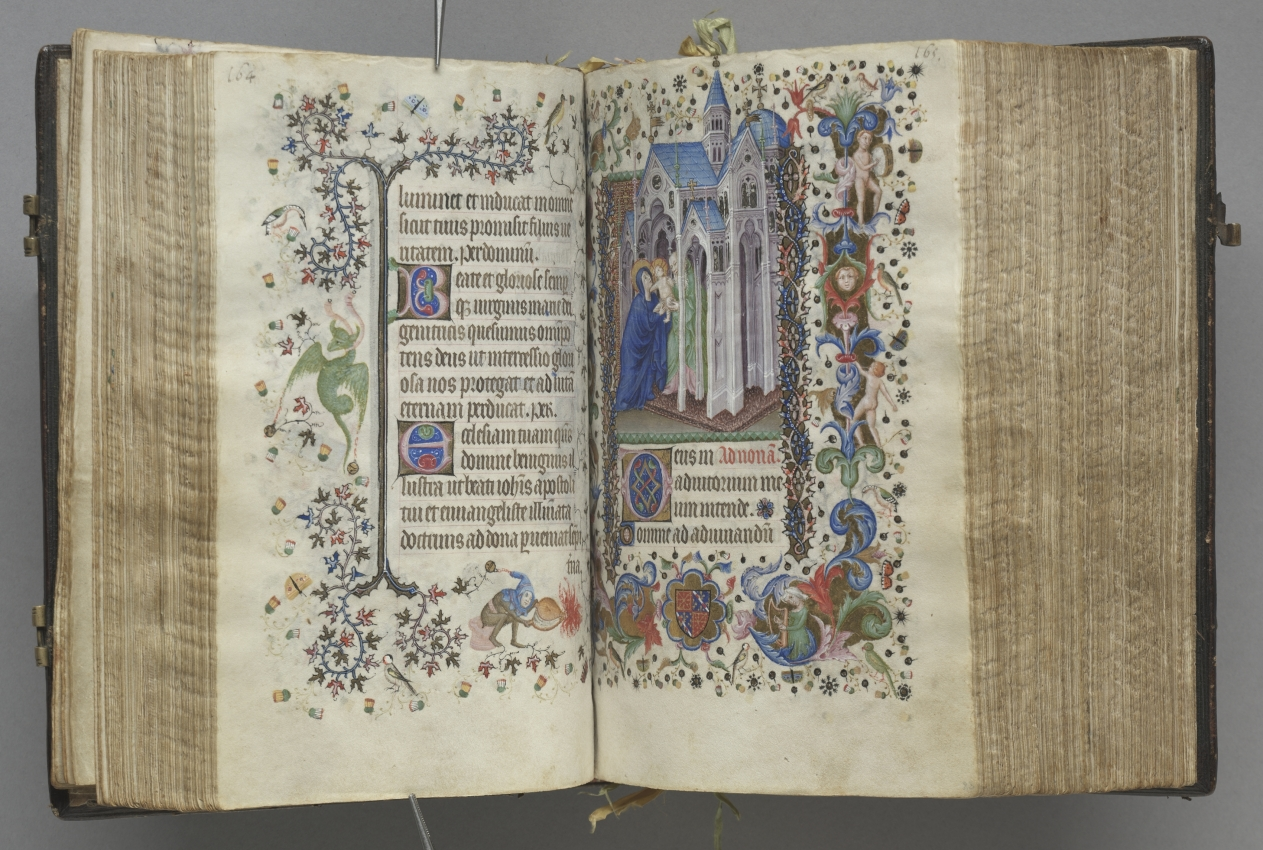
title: Hours of Charles the Noble, King of Navarre (1361-1425): fol. 82vr, Presentation in the Temple (Nones)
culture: France, Paris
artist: Master of the Brussels Initials and Associates (French)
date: c. 1405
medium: ink, tempera, and gold on vellum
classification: Bound Volume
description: This precious volume was obviously highly prized by its owner, the French-born King of Navarre, who had his coat of arms painted on no less than 20 folios. Rather than directly commissioning this manuscript from a specific workshop, it seems that Charles the Noble acquired his book of hours—perhaps ready-made for the luxury market—while on a trip to Paris in 1404–5. A collaborative effort, it contains six painting styles within its pages, those of two Italians, two Frenchmen, and two Netherlanders. The painter who was responsible for the planning and decoration of the book, and who produced 17 of the large miniatures, was a Bolognese artist known as the Master of the Brussels Initials. His principal assistant, responsible for most of the borders, was a Florentine who signed his name "Zecho" da Firenze on folio 208 verso.